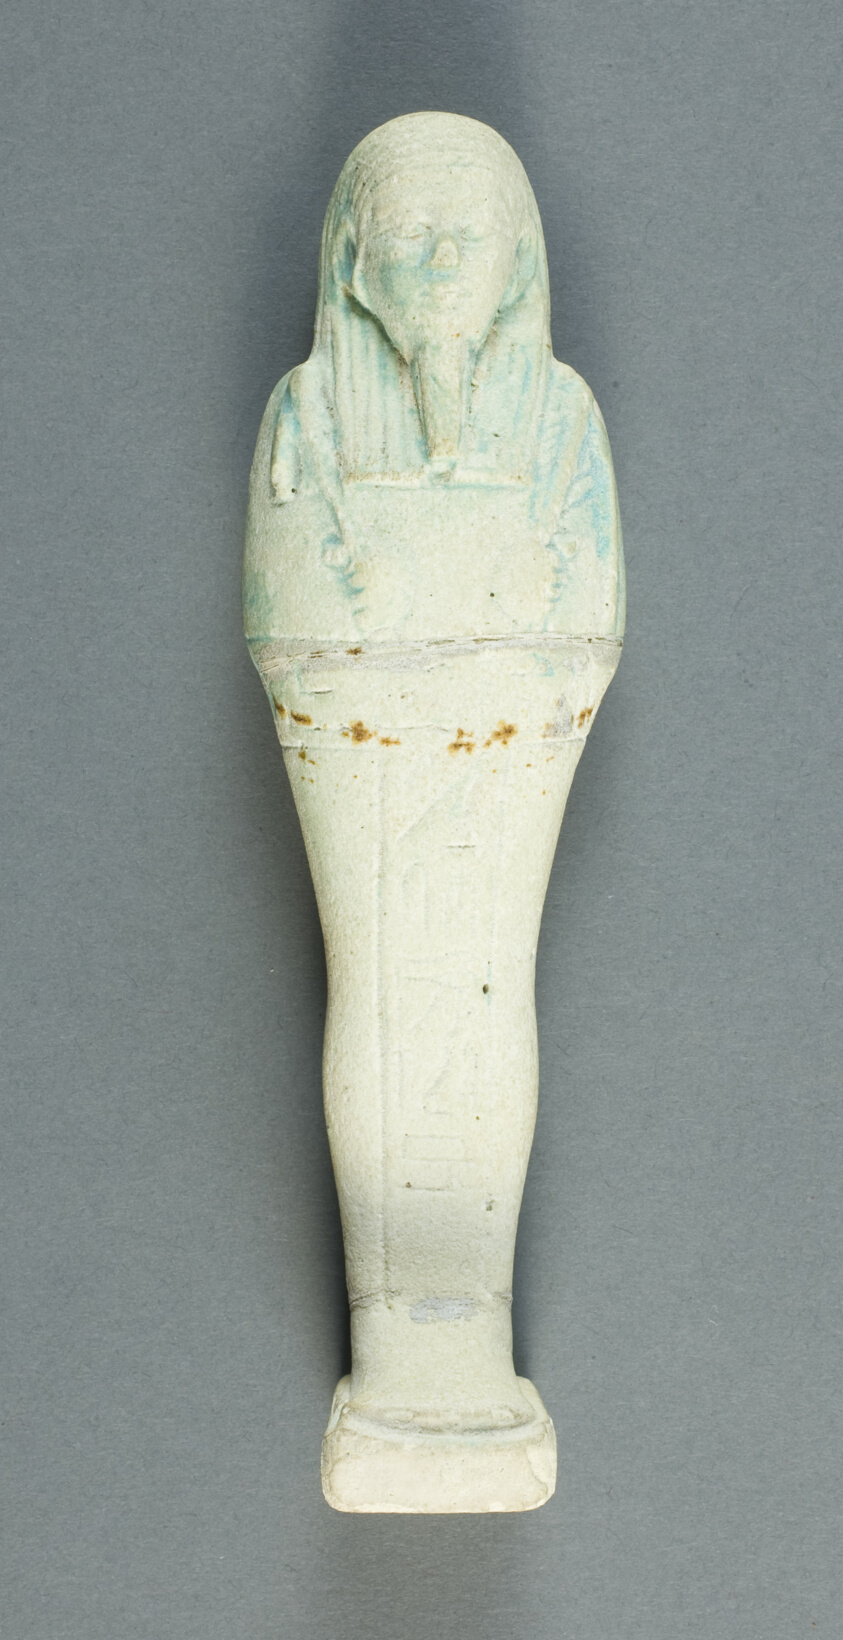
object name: Funerary Object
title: Shabti of Osiris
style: late period (egyptian), ancient, egyptian, thirtieth dynasty, twenty-eighth dynasty, twenty-ninth dynasty, twenty-seventh dynasty, twenty-sixth dynasty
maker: Egyptian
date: Late Period, Dynasty 26–30 (664 BCE–343 BCE)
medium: Faience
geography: Egypt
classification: ushabti; figurine; ancient art; funerary; mummy goods; faïence (composite material)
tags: funerary art, figurines, Hieroglyphs, men, mummies